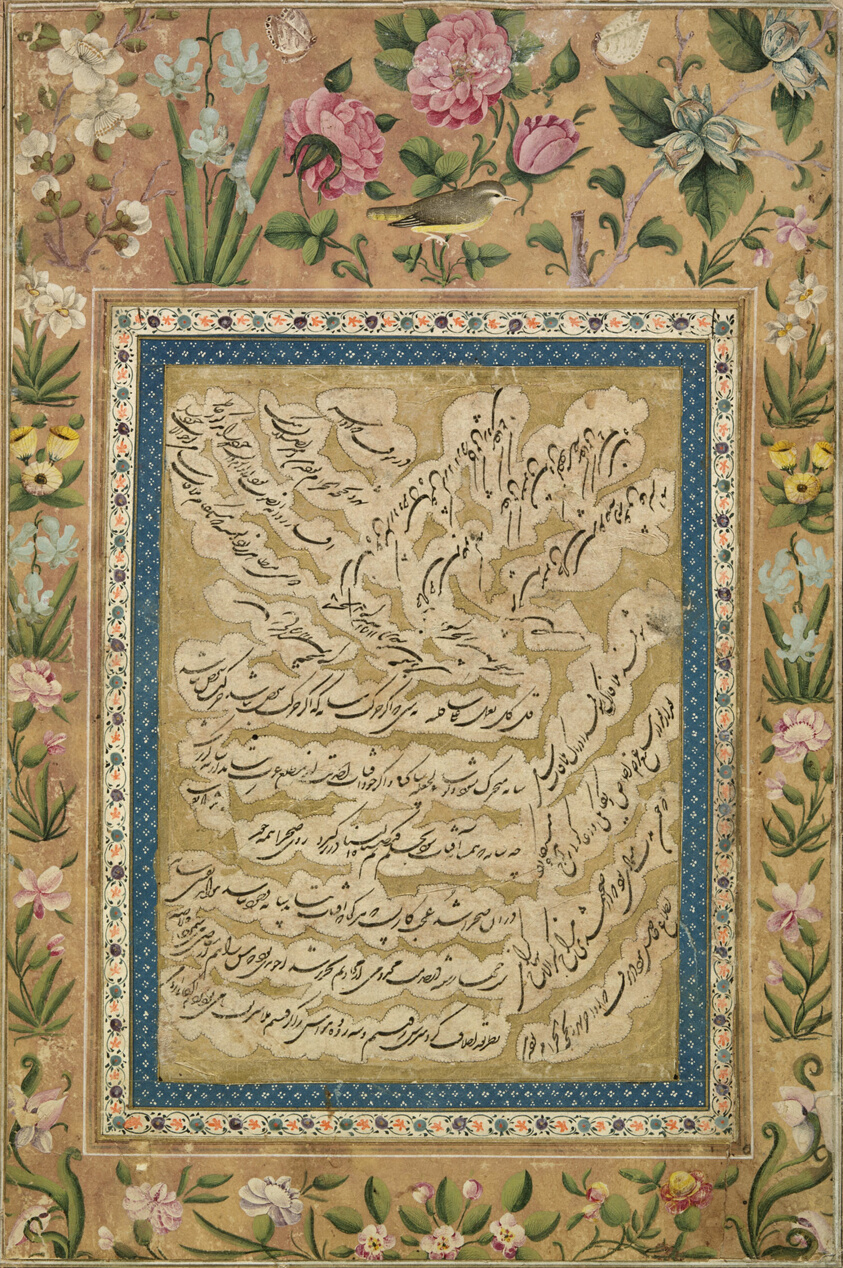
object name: Print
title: Page of Shikasta Nasta'liq Calligraphy with Floral Margins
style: Islamic (culture or style)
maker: Iran; Attributed to Abd al-Majid Taleqani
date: Zand dynasty (1750–1794), 1767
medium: Ink, gold, and watercolor on paper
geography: Iran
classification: print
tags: writing, blue (color), green (color), flowers, flora